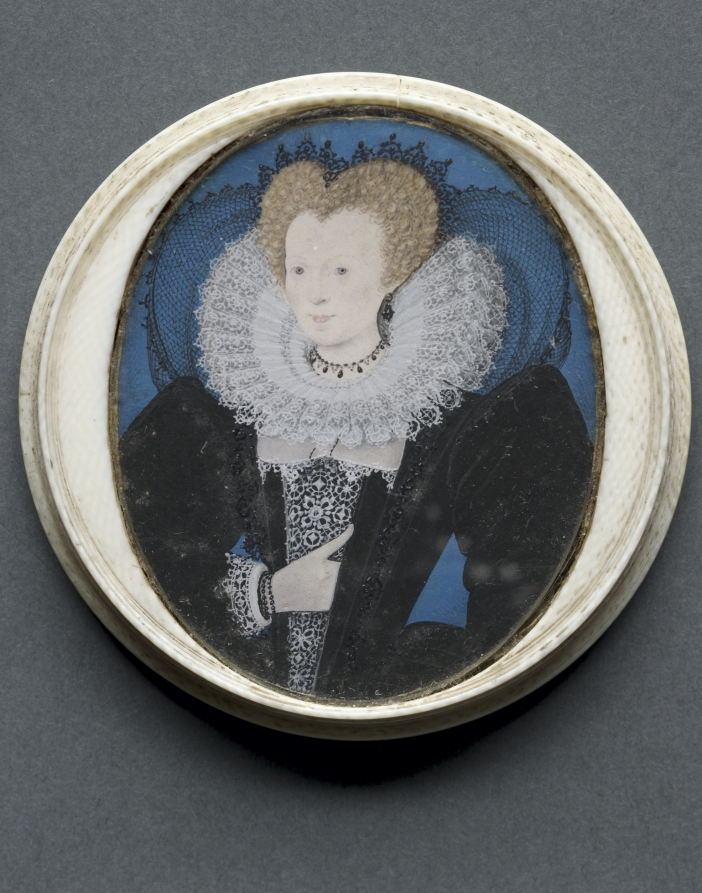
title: Portrait of a Woman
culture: England, 16th century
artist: studio of Nicholas Hilliard (English, c. 1547–1619)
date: 1590s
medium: watercolor on vellum in original turned ivory case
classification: Portrait Miniature